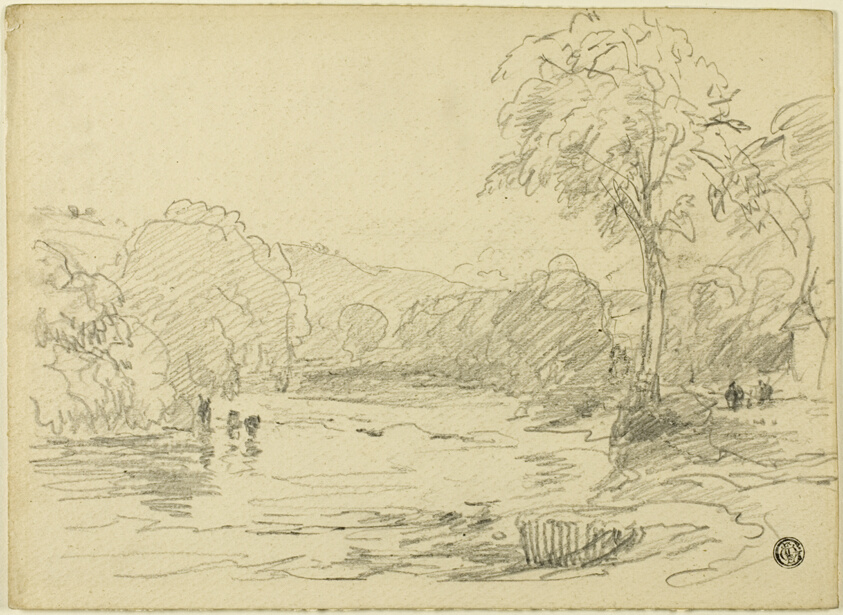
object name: Drawing and Watercolor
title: River Scene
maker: Probably David Cox, the elder; English, 1783-1859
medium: Graphite on buff wove paper, laid down on buff wove paper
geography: England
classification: graphite; drawings (visual works); prints and drawing